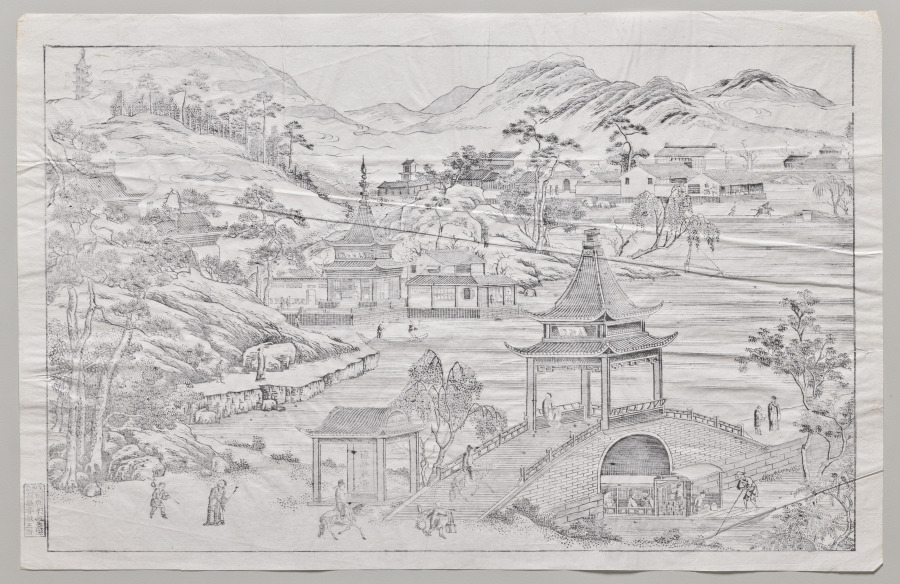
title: Westlake Panorama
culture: China, Qing dynasty (1644–1911), Qianlong reign (1736–95)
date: mid-1700s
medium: One of four woodblock prints; ink on paper; printed with three woodblocks in shades of black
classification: Print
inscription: 信德號 姑蘇管瑞玉頂細西洋畫發客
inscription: The 10 scenes on the four prints are identified by their titles: Print one: 1. Remnant Snow on Broken Bridge (Duanqiao canxue, 斷橋殘雪), 2. Lotus Breeze at Qu Winery (Quyuan fenghe, 曲院風河 [sic]). Print two: 3. Autumn Moon over Placid Lake (Pinghu qiuyue, 平湖秋月), 4. Twin Peaks Piercing the Clouds (Liangfeng chayun, 兩峰插云), 5. Spring Dawn at Su Dike (Sudi chunxiao, 蘇 堤春曉), 11. The emperor’s temporary palace (xinggong, 行宮). Print three: 6. Listening to the Orioles by the Willow Ripples (Liulang wenying, 柳浪 聞鶯), 7. Three Stupas and the Reflecting Moon (Santan yinyue, 三潭印月). Print four: 8. Watching Fish at Flower Cove (Huagang guanyu, 花港觀魚), 9. Sunset at Leifeng Pagoda (Leifeng xizhao, 雷峰夕照). 10. Evening Bell from Nanping Hill (Nanping wanzhong, 南屏晚鍾.) In print two, 11. the emperor’s temporary palace (xinggong 行宮) is also identified.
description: Revived by the southern imperial inspection tours, West Lake imagery became a popular subject during the early Qing dynasty. This panorama is composed of four prints, showing the Ten Scenes of the West Lake in Hangzhou along with other sights. The vanishing point perspective and the hatching lines that depict shading, water, or sky derive from European copperplate prints, introduced by missionaries to China, and were celebrated novelties in 18th-century Suzhou prints. These prints also reached Europe to furnish 18th-century palace interiors.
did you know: Woodblock printing in color reached a height in China in the 1600s to 1700s. The prints were executed by means of sets of separate blocks, each carved to print a different color.